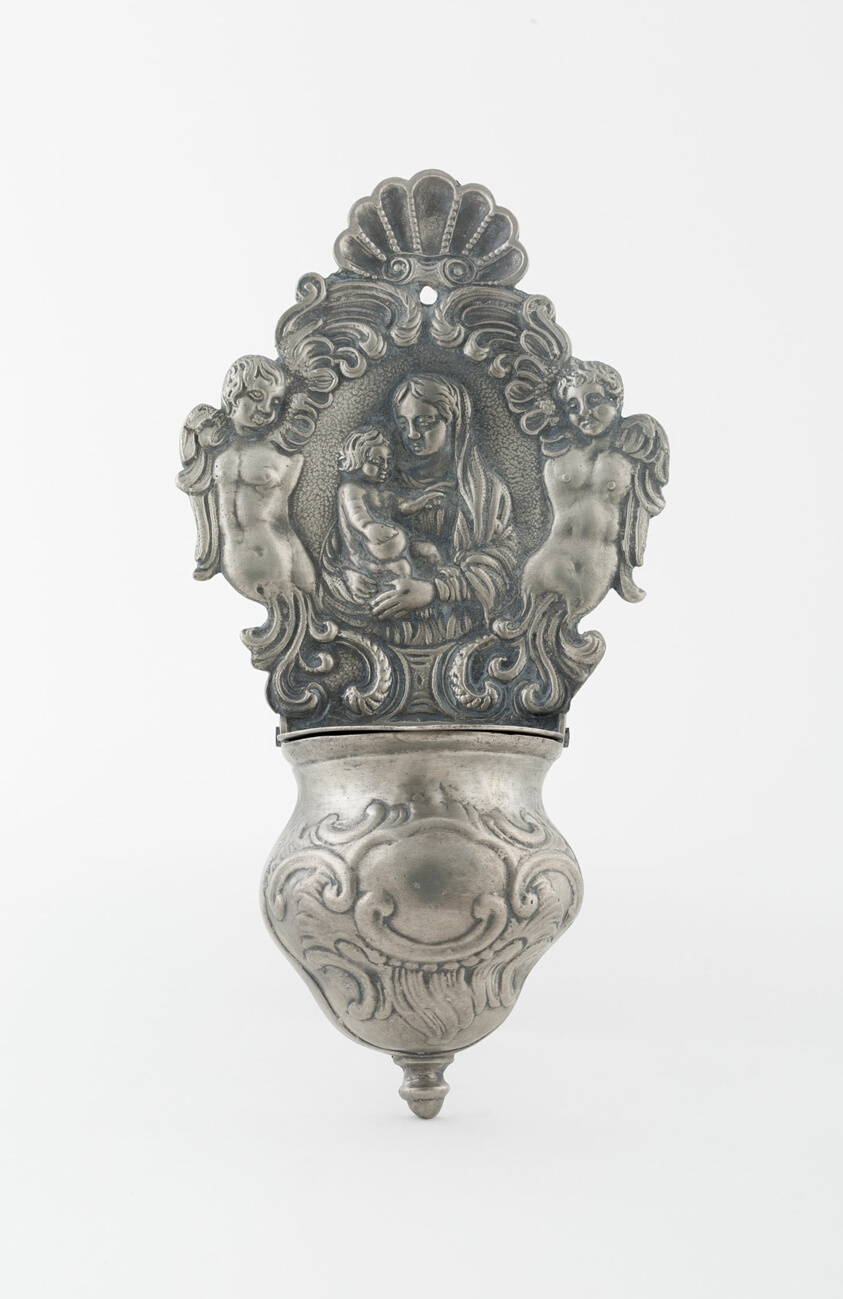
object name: Metalwork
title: Holy Water Stoup (Bénitier)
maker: Possibly Flanders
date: 18th century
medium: Pewter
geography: Flanders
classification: pewter; metalwork; european decorative arts